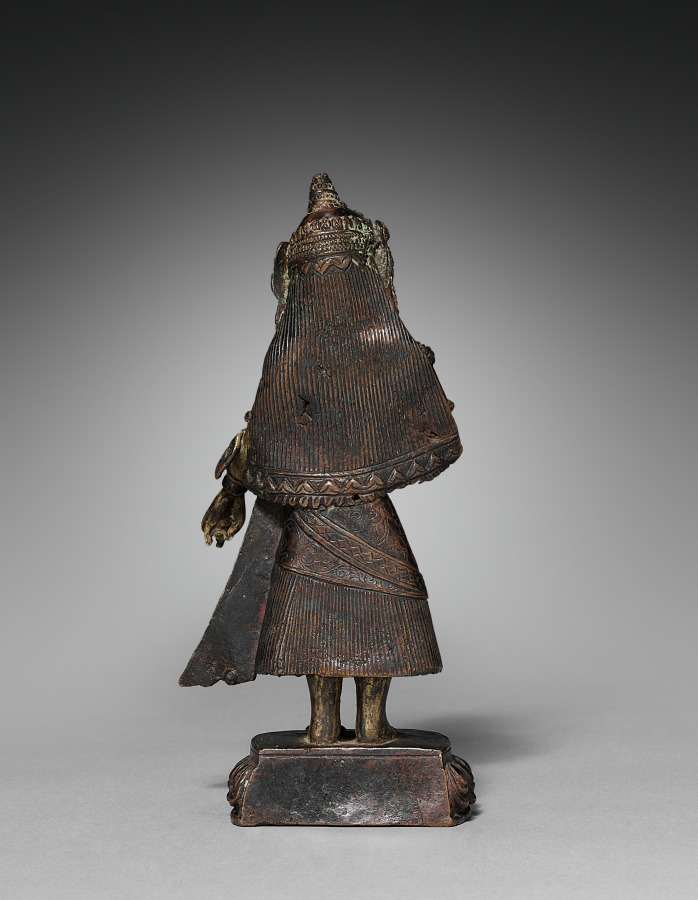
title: Royal Female Donor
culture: Nepal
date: c. 1500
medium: bronze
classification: Sculpture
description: Carrying a lamp in one hand, this female figure draped in finery was probably included as the donor of a sculptural group. She wears a complex headdress consisting of a network of beads and plaques joined together, ending in a bell at her forehead and crowning a long cloth that reaches to her waist. Her position on a lotus flower may indicate the transcendent state she attained as a result of the karmic merit of her donation.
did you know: The pleated skirt tied with a scarf around her waist is characteristic of Nepal.